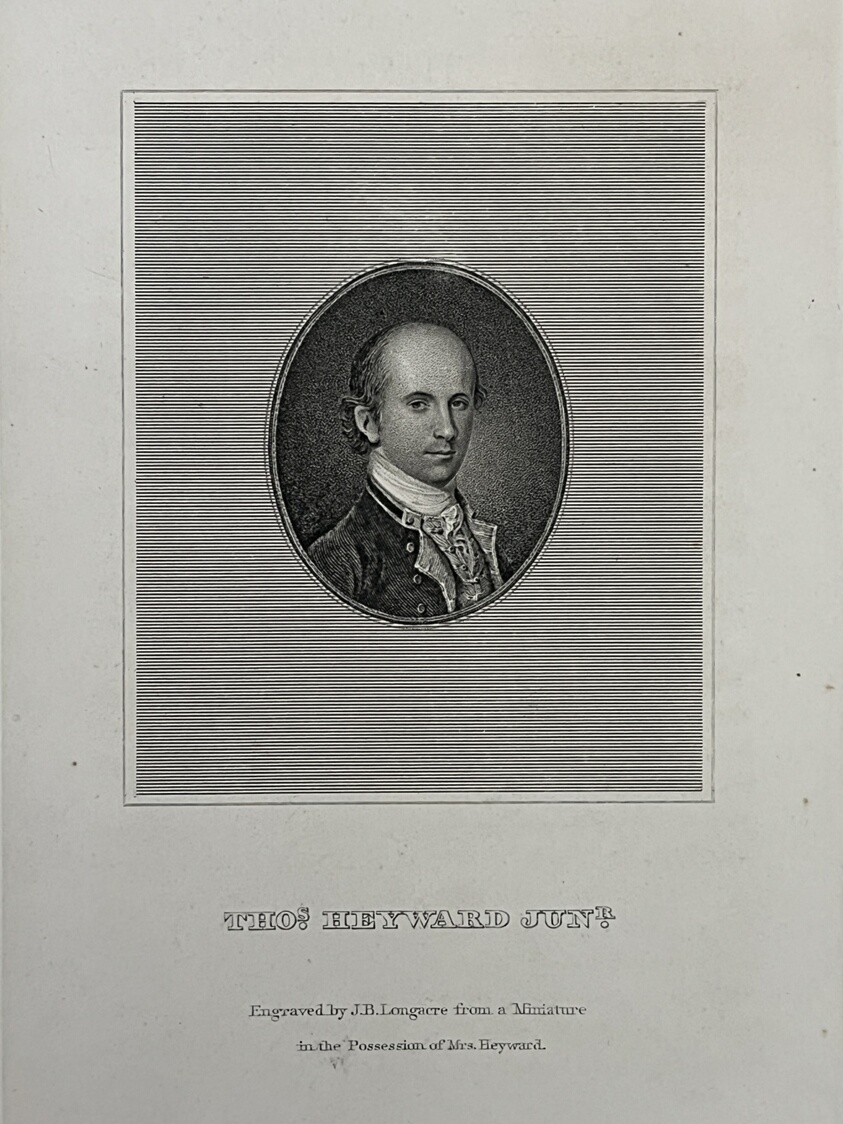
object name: Print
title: Thomas Heyward Junior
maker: James Barton Longacre (American, 1794-1869); possibly after Philippe Abraham Peticolas (American, 1760-1841)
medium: Stipple and line etching on paper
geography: United States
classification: reproduction; print; prints and drawing